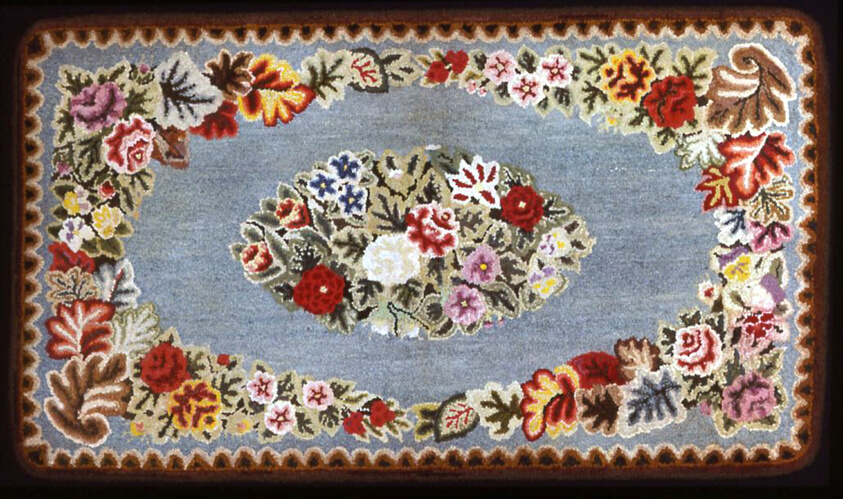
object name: Textile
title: Rug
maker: United States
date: 19th century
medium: Variety of fibers, plain weave with variety of fibers, yarns, felted, knitted, oblique interlaced and/or woven strips, forming "hooked" pile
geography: United States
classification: textile; weaving - rug